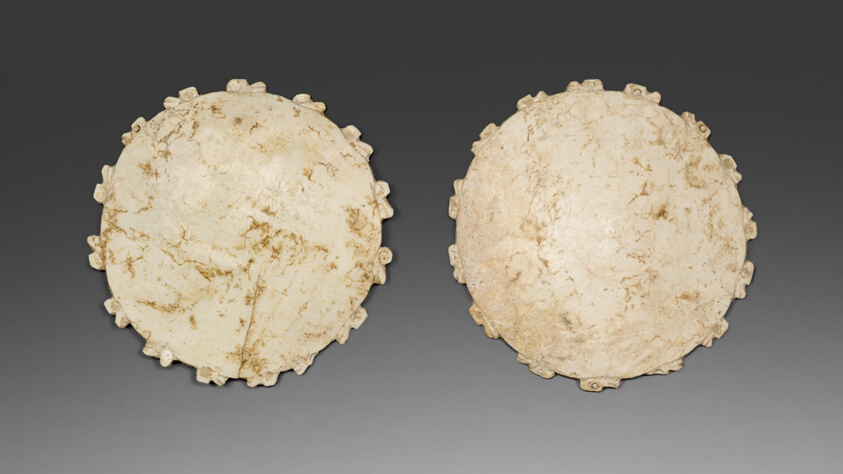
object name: Costume and Accessories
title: Ear Spools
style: colima, mesoamerican, jalisco, americas, west mexico, Arts of the Americas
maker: Colima or Jalisco; Colima or Jalisco, Mexico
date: 200 BCE–200 CE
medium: Spondylus shell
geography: Western Mexico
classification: ear ornament; jewelry; art of the americas; costume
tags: shells, bird, jewelry